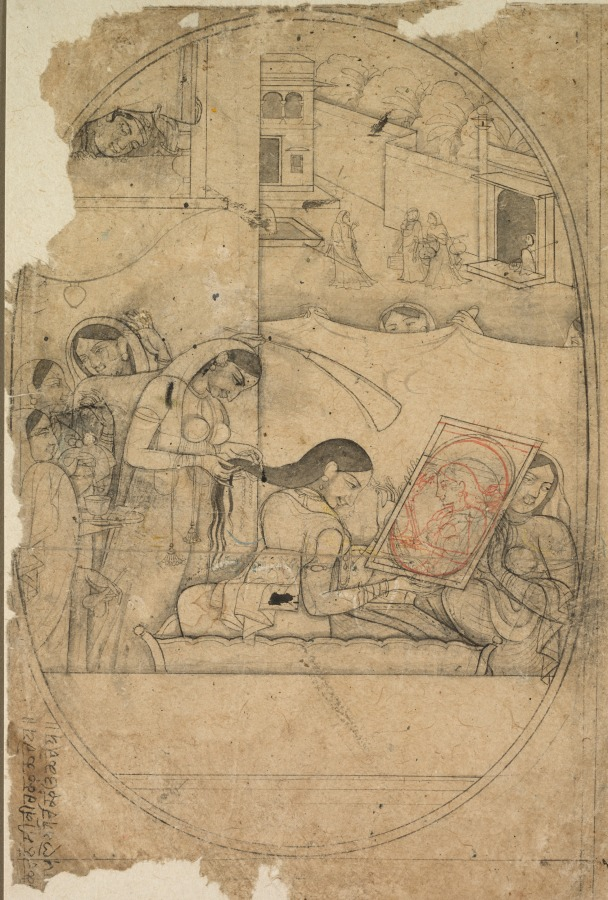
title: Radha's hair being dressed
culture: Northern India, Pahari kingdoms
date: c. 1790–1800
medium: Gum tempera with touches of color on paper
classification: Painting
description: This drawing is probably a study for a finished painting rather than an underdrawing that was meant to be painted over, due to the care and attention given to the fine details and expressions. Our attention is so focused on Radha in the center, as she applies an ornament in the mirror, that we scarcely notice Krishna peeping at her from a second-story window. Her attendants hold up a curtain to give her privacy, while others fix her hair, hold the mirror, whisk away the flies, and bring her drinks. In the background, female musicians carry instruments for a performance.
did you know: Radha’s mirror, as well as the curving bodies of the women and their fans, mimic the ovular frame of the drawing.